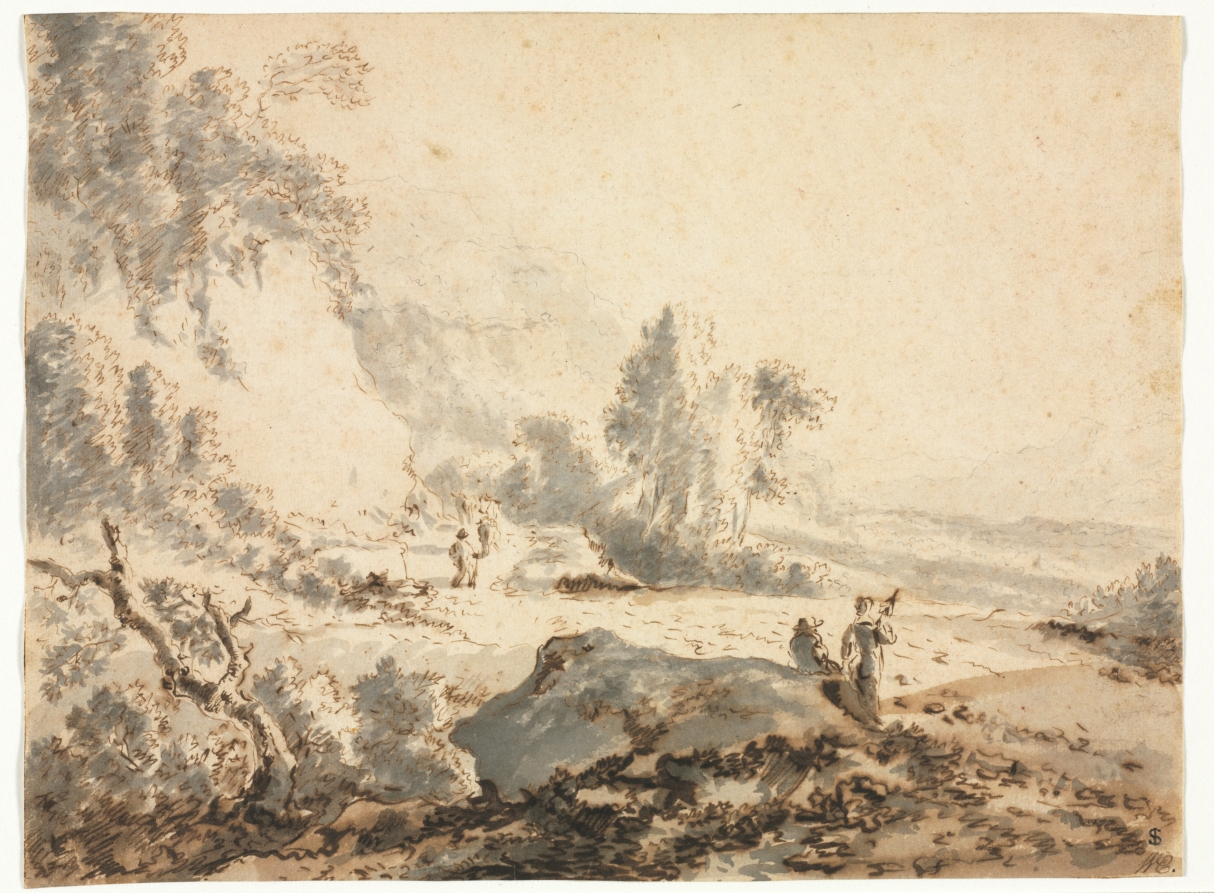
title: Landscape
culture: Netherlands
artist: Anonymous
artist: copy after Jan Hackaert (Dutch, 1629–c. 1700)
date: 1700s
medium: pen and brown ink and brush and gray and brown wash over graphite; framing lines in brown ink (left edge and bottom) and graphite (upper edge)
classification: Drawing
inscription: VERSO, upper center, in graphite: 3 ; SECONDARY SUPPORT (now removed), lower center, in brown ink: 134-2 ; lower center, in brown ink: A Pynacker. ; lower center, in graphite: Adam Pynacker / 1622 Pijnacker b Delft - Amsterdam 1673 ; lower left, in graphite:1657 ; lower center, in graphite: 1650 ; VERSO OF SECONDARY SUPPORT (now removed), upper center, in brown ink: O / No. 58 ; lower left, in brown ink: Lord Spencer's coll. 1811 WE P 80 n 134. ; upper left, in graphite: [405?] ; lower left, in graphite Coll. Spencer 1811 / Esdaille / Valkema Blouw / E.-J. Otto ; lower right, in graphite: vgl. [underlined] Leiden Prentenkab. d. R.U. / 287 (de felder 95, unter " J. Hackert") ; lower right, in gaphite: 4398 [underlined] / 169 [?]